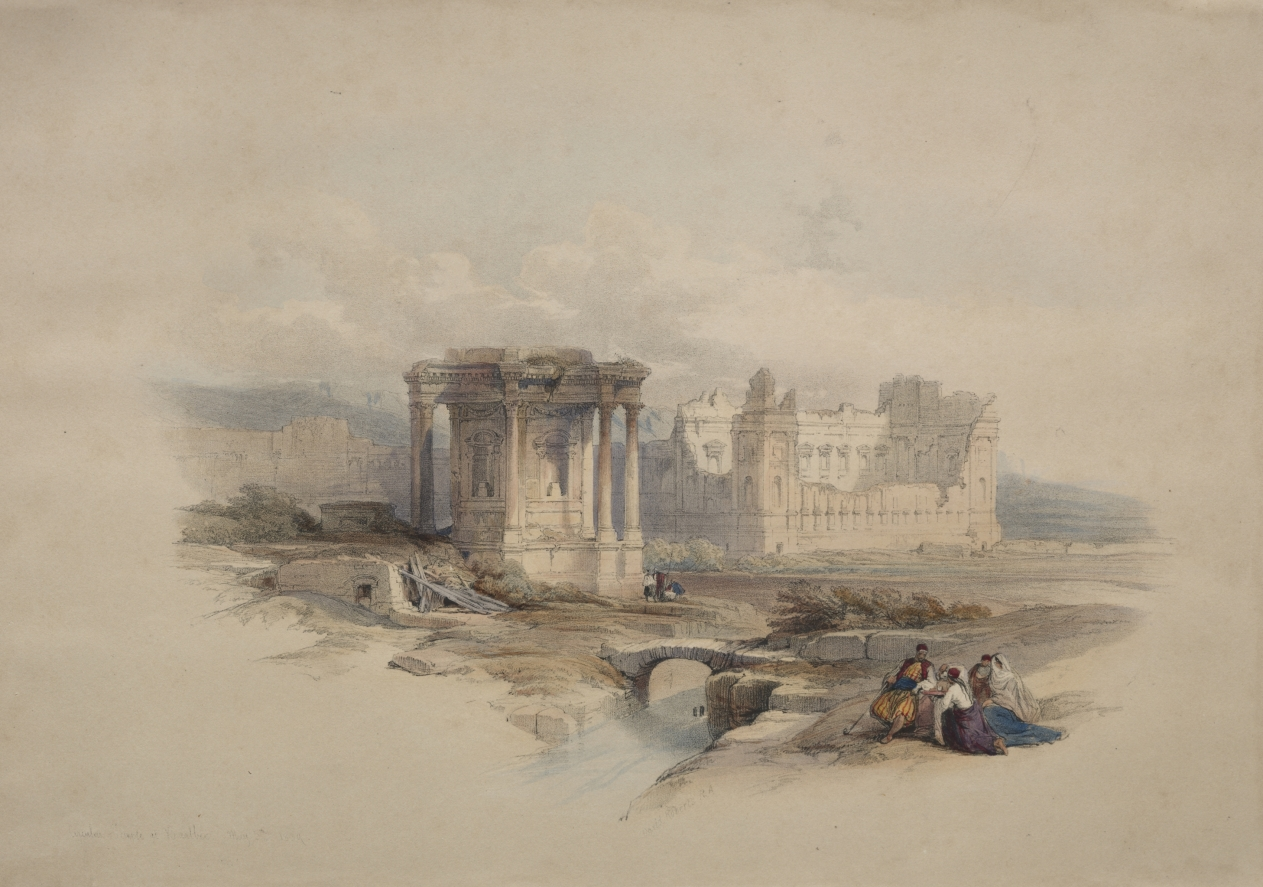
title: Circular Temple at Baalbec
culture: England, 19th century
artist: David Roberts (Scottish, 1796–1864)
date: 1839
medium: color lithograph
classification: Print